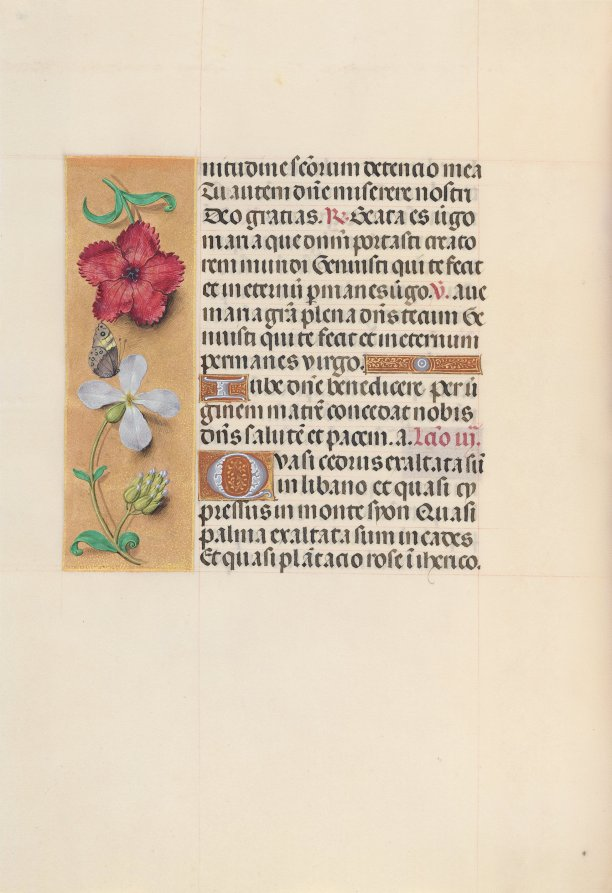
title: Hours of Queen Isabella the Catholic, Queen of Spain: Fol. 111v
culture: Flanders, Ghent and Bruges, late 15th century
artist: Master of the First Prayerbook of Maximillian (Flemish, c. 1444–1519)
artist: and Associates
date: c. 1500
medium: ink, tempera, and gold on vellum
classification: Bound Volume